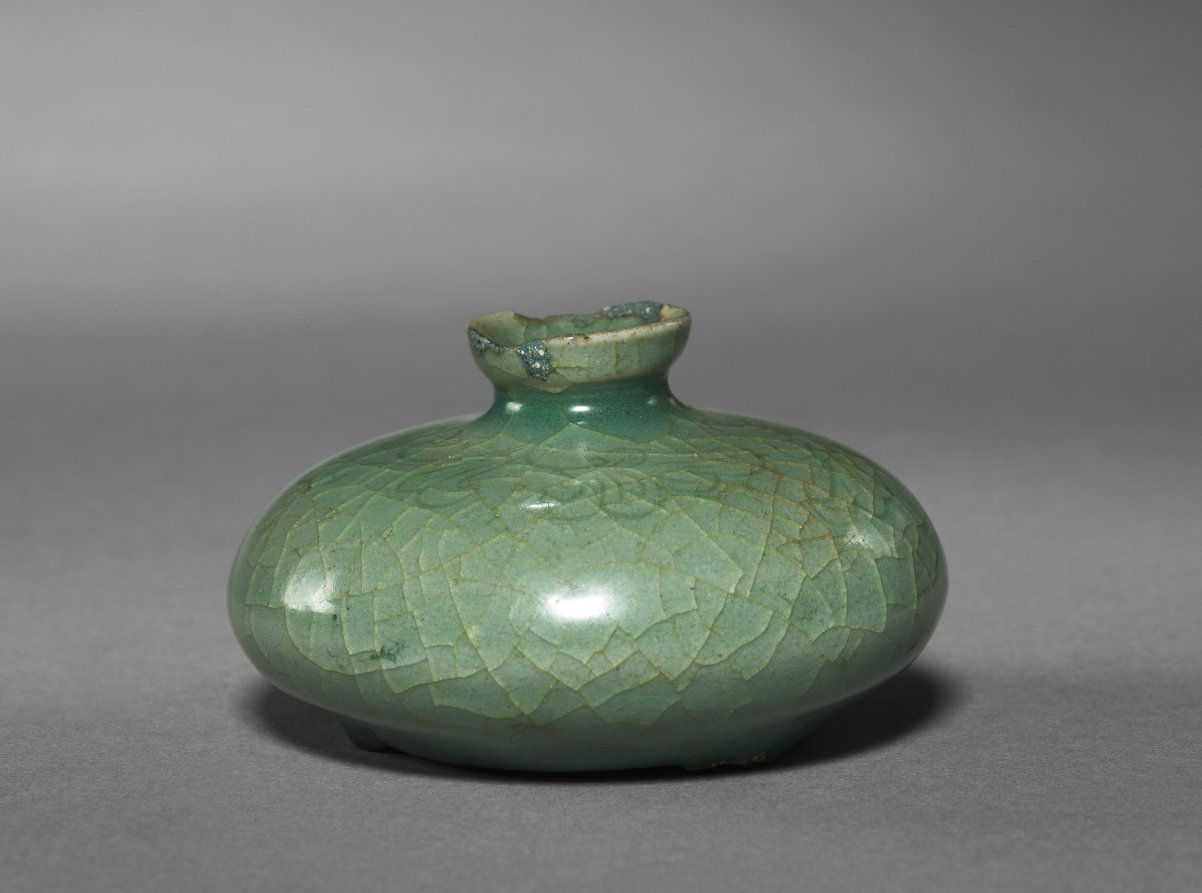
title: Oil Bottle with Scroll Design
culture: Korea, Goryeo dynasty (918–1392)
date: 1100s-1200s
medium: celadon ware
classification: Ceramic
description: Celadons, spoons, seals, and bronze mirrors were the most common burial objects in tombs during the Goryeo period (918–1392). Once used to contain oil treatment for hair, this little celadon bottle was one of the standard goods that furnished elites' tombs.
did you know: This bottle was used to contain oil treatment for hair.